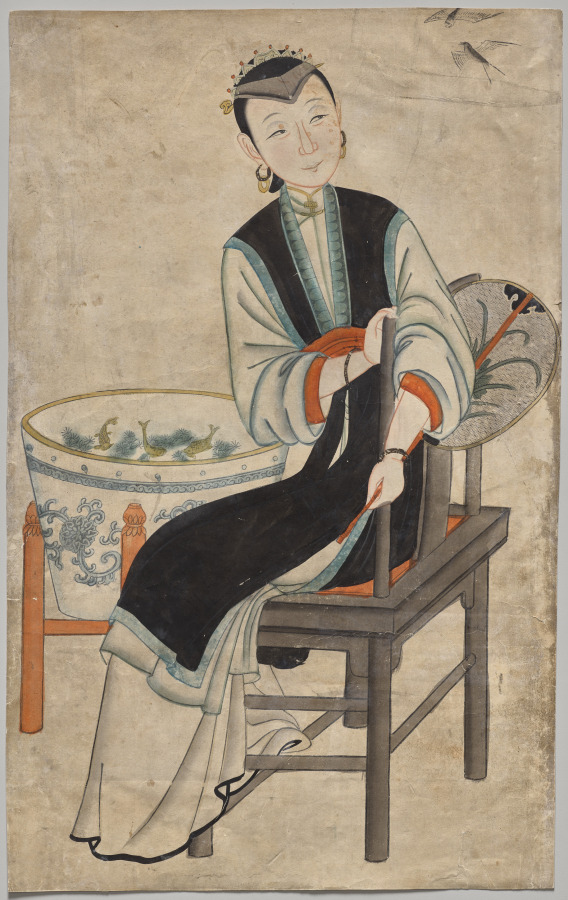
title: Two Beautiful Ladies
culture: China, Qing dynasty (1644–1911), Qianlong reign (1736–95)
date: 1736–95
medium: Polychrome woodblock print; ink and color on paper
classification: Print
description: In the 1600s, printing flourished in such Jiangnan cities as Nanjing, Suzhou, Hangzhou, and Huizhou, evolving from privately enjoyed illustrated books printed in color to more commercialized single-sheet color prints that were hung on walls and became part of the rich urban visual culture.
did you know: Woodblock printing in color reached a height in China in the 1600s to 1700s. The prints were executed by means of sets of separate blocks, each carved to print a different color.